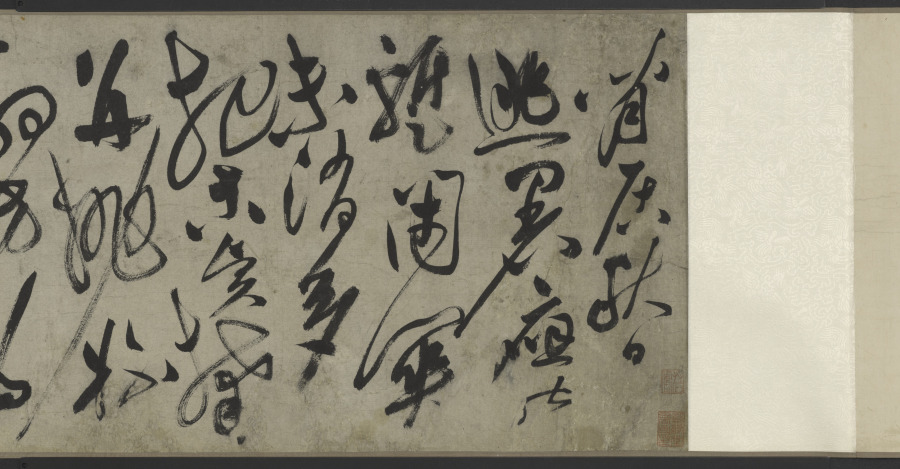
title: Retreat on an Autumn Day, in Cursive Script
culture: China, Ming dynasty (1368–1644)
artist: Zhu Yunming (Chinese, 1460–1527)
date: dated 1523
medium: Handscroll; ink on paper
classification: Calligraphy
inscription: 款識：讌於從一堂，爛漫醉書。癸未（1523）七月晦日也。枝山允明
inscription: 《閒居秋日》逃暑應能蹔閉關，未消多把古賢攀。並拋杯酌方為懶，少事篇章恐礙閑。風墮一庭鄰寺葉，雲開半面隔城山。浮生只說潛居易，隱比求（脫「名」）事更艱。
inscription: 《句曲道中》老至誰憐晝錦明，春來聊得客襟清。宵依星斗宮壇臥，曉（脫「入」）神仙宅舍行。眼看山多城郭少，肩挑詩重簿書輕。何時總入煙霞去。不見人間寵辱驚。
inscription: 《登茆峰》下馬門前一振衣，翠微高迥逼清微。雲端洞裡仙人過，月下山中長史歸。金焰暈牀砂氣伏，紫雲穿竇朮芽肥。神方能詠不能遇，一夜爽靈峰外飛。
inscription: 鈐印：「晞哲」、「允明」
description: This masterwork of calligraphy by Zhu Yunming from Suzhou combines two poems by the artist in cursive script style, characterized by its uninhibited, swift, and intuitive brushwork, so powerful that it here dissolved characters into dots or lines. Written from right to left and top to bottom and alternating in light dry to deep saturated ink, single characters may take a whole column or extend into the next one. Following the movement of the brush, they seem to dance over the paper.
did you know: Zhu Yunming stated that he was in an inebriated state when he created this work.